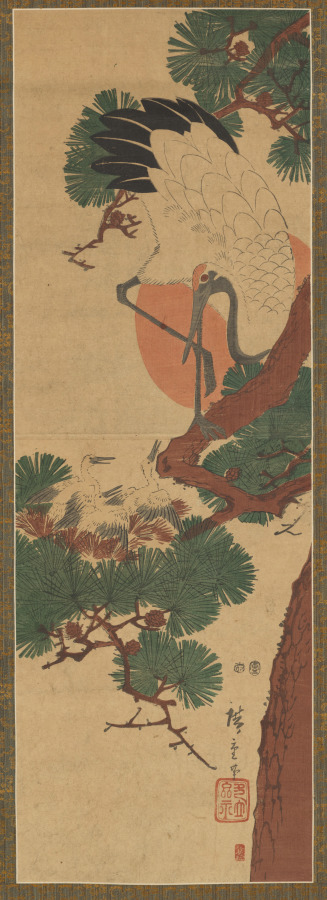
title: Stork, Sun, and Pine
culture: Japan, Edo period (1615–1868)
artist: Utagawa Hiroshige II (Japanese, 1826–1869)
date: c. 1839–1864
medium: color woodblock print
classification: Print